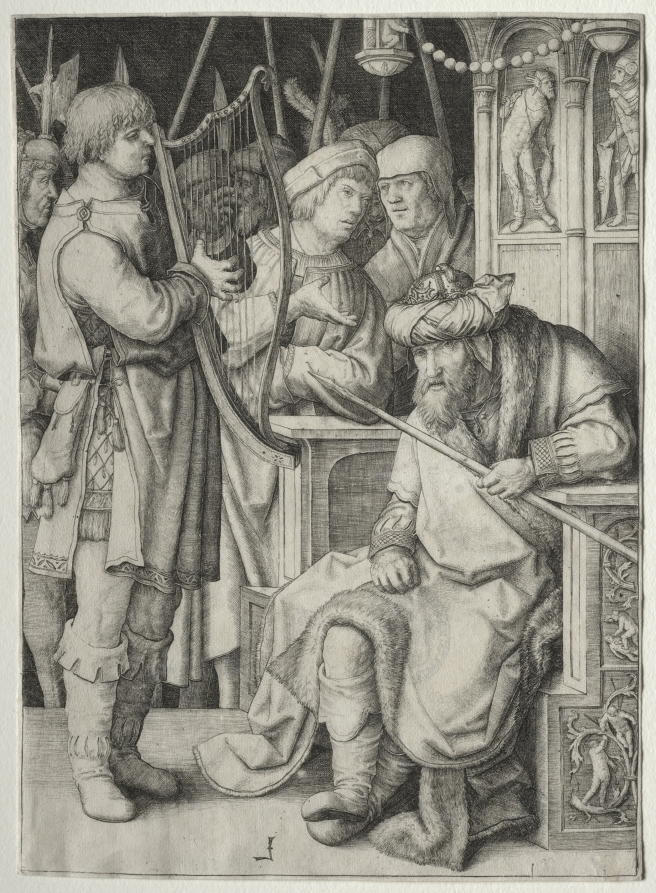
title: David Playing the Harp before Saul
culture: Netherlands, 16th century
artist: Lucas van Leyden (Netherlandish, 1494–about 1533)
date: c. 1508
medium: engraving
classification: Print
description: A skillful player of the harp, David was summoned to the court of King Saul in order to console the king who was often tormented by melancholy. Lucas van Leyden masterfully captured the despair of the king who sits uncomfortably upon his throne, his right foot angled convulsively over the left one, his gaze a blank stare. While playing, David looks calmly upon the ruler, as if to convey his confidence that music will provide the necessary balm to soothe the king’s soul.